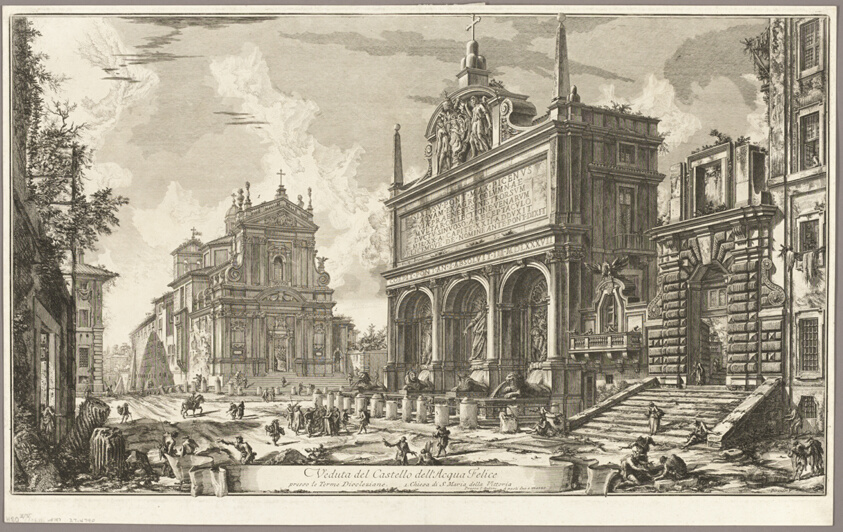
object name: Print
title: View of the Fountainhead of the Acqua Felice, from Views of Rome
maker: Giovanni Battista Piranesi (Italian, 1720-1778)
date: 1750/59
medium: Etching on heavy ivory laid paper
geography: Italy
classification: etching; print; prints and drawing